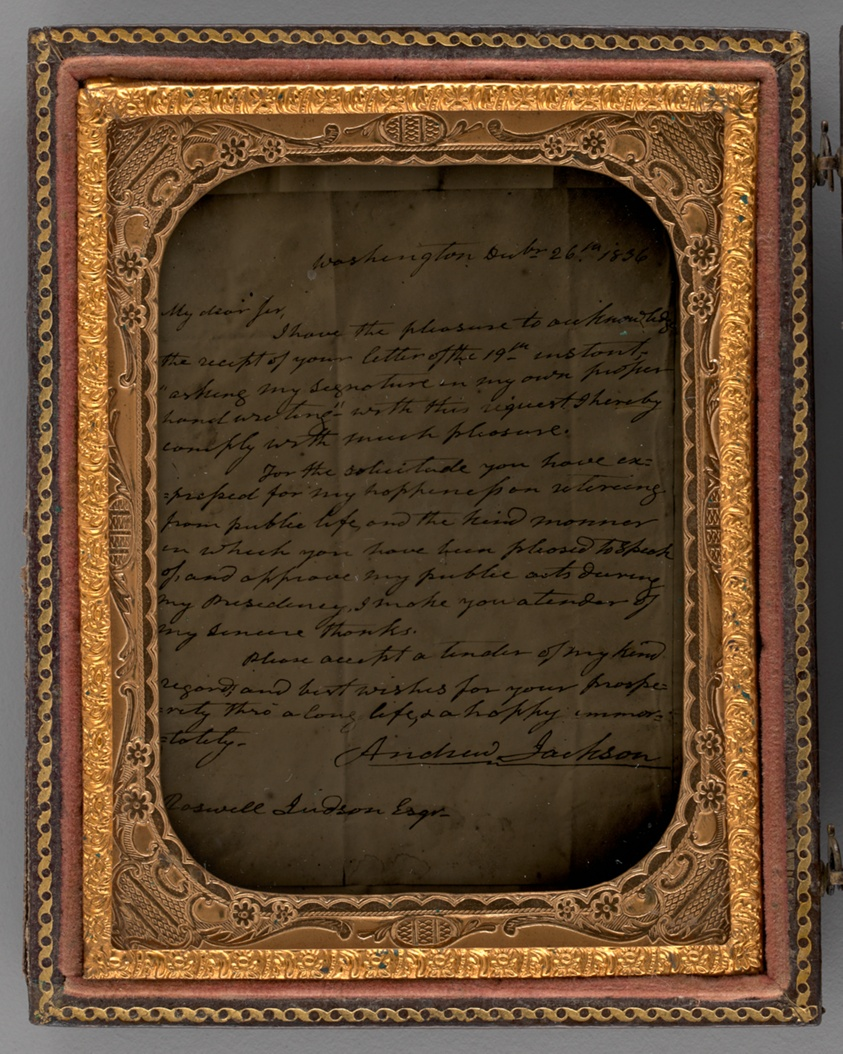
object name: Photograph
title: Untitled (Letter from Andrew Jackson, Washington, December 26, 1836)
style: 19th century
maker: Unknown maker; American, 19th century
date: 1870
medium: Ambrotype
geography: United States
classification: photography; photograph; photographic process; portrait; portrait; ambrotype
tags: lundberg collection, letters (correspondence), photography